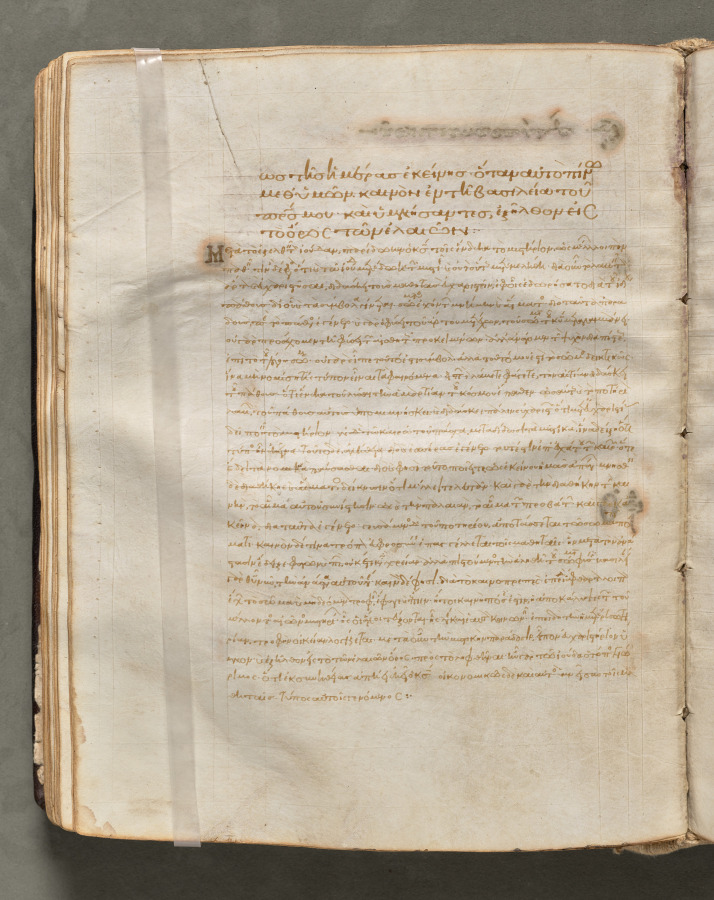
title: Text, folio 117 (verso), from a Gospel Book with Commentaries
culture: Byzantium, Constantinople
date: c. 1000–1100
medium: ink, tempera, and gold on vellum; leather binding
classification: Bound Volume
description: Each of the four gospels in this book opens on a page with brilliantly illuminated borders depicting the author of the text as well as birds-principally peacocks, symbols of the immortality of the soul-and fountains, representing the fountain of life and the salvation of the soul. This volume consists of 428 leaves with texts in Greek. Its level of sophistication suggests that it was probably written and decorated in a monastery in Constantinople.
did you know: Gospel Books were carried in procession through Byzantine churches.